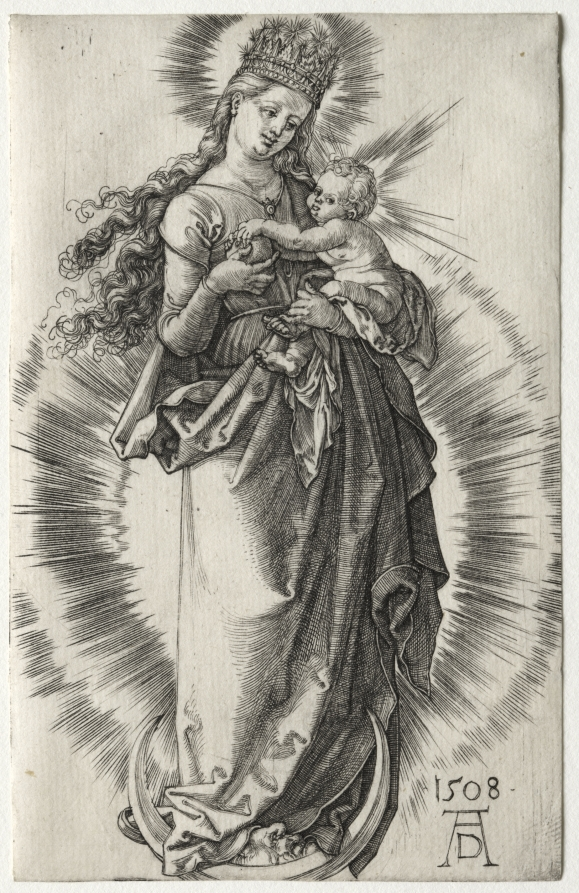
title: The Virgin with a Starry Crown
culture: Germany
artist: Albrecht Dürer (German, 1471–1528)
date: 1508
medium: engraving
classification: Print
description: Dürer made four engravings of the Virgin and Child standing on a crescent moon. These devotional images link the Madonna with the pregnant woman of the apocalypse from chapter 12 of the Book of Revelation. The verse says that "a woman clothed with the sun, and the moon under her feet, and on her head a crown of twelve stars . . . " appeared in heaven, delivering a son to conquer Satan—a prefiguration of Christ. In direct contrast with the crowned Virgin here, whose double aureole shines extravagantly around her figure, Dürer conceived the Madonna (1958.116) with simplicity and humility. In each he presents the dual roles of the Virgin as the Queen of Heaven and as the humble mother of Jesus.